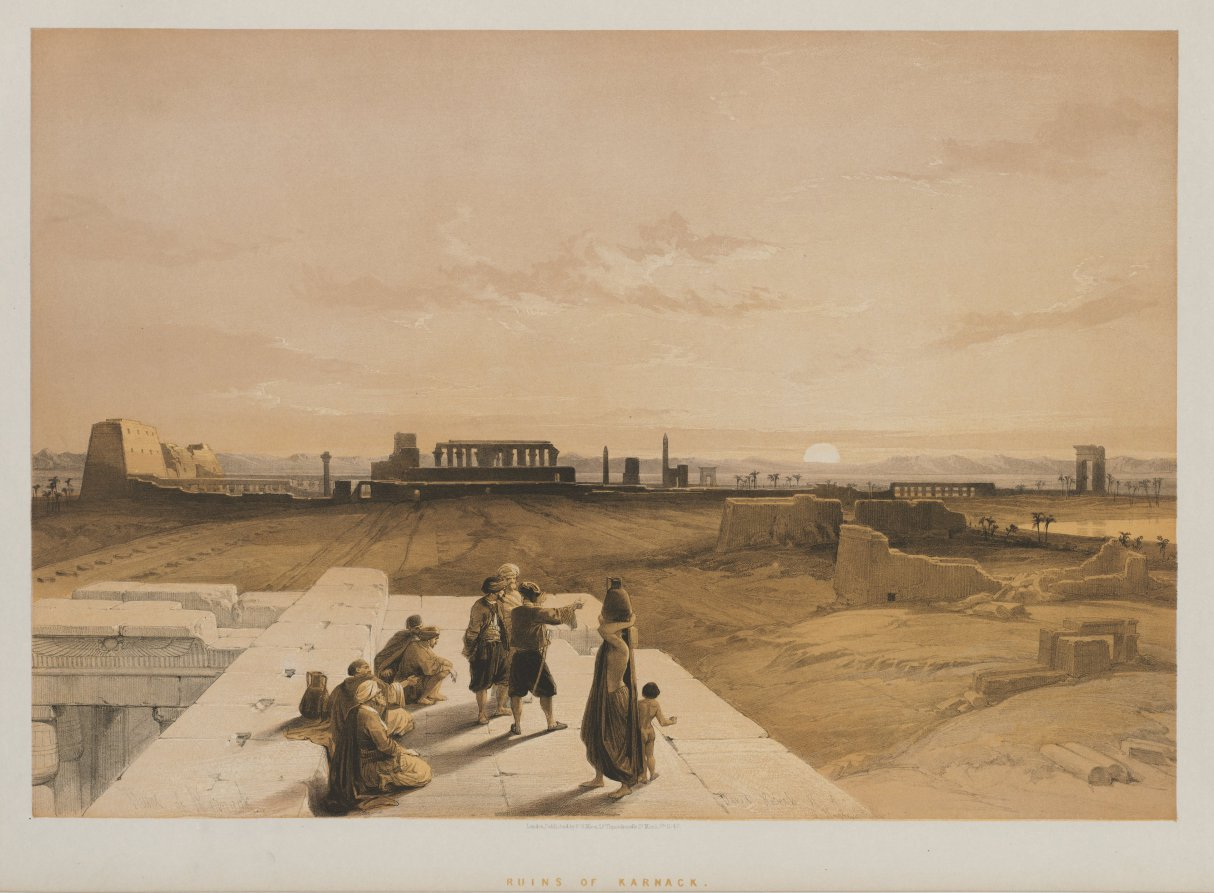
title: Egypt and Nubia, Volume I: Ruins of Karnac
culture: England, 19th century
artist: Louis Haghe (British, 1806–1885)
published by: F. G. Moon, 20 Threadneedle Street, London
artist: after David Roberts (Scottish, 1796–1864)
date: 1847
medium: color lithograph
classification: Print